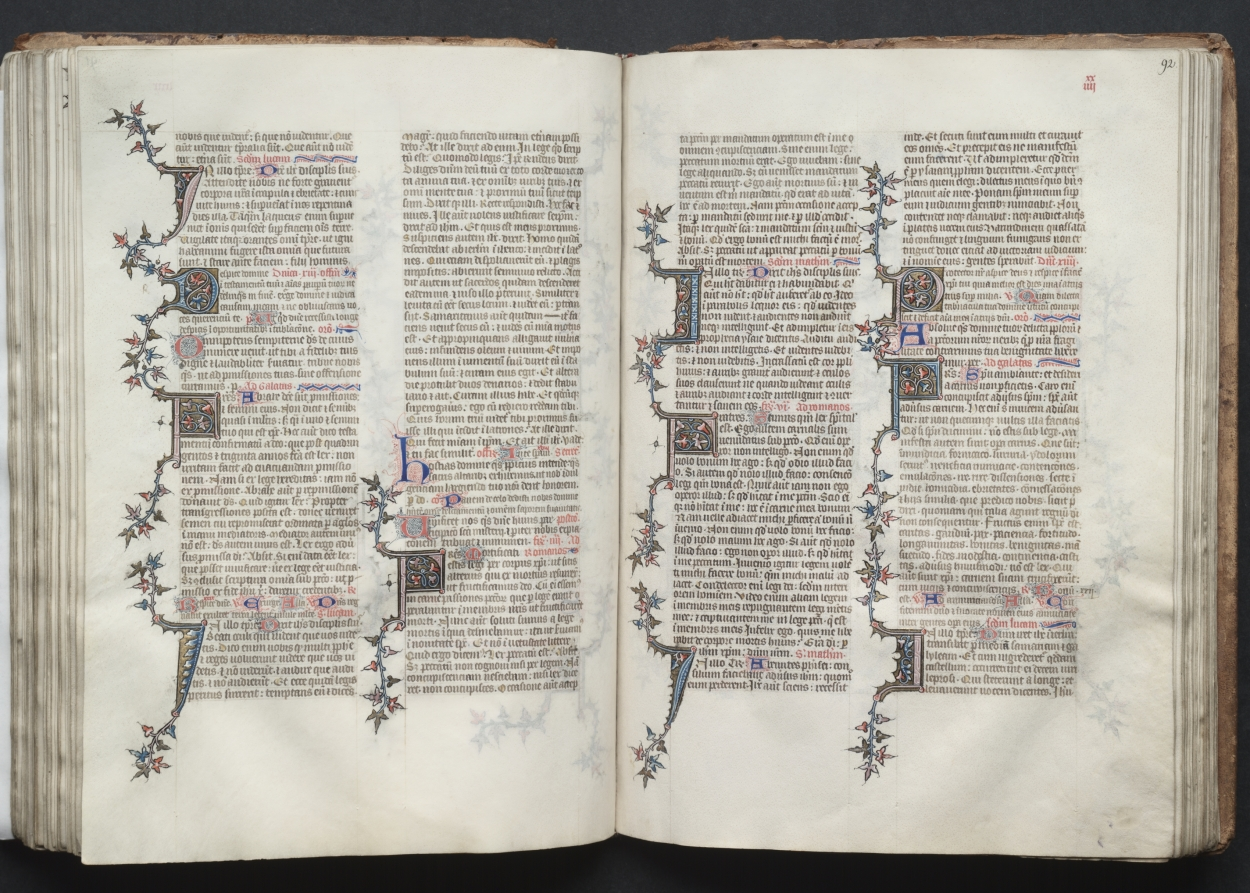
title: The Gotha Missal: Fol. 91v, Text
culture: France, Paris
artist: Master of the Boqueteaux (French)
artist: and Workshop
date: c. 1375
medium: ink, tempera, and gold on vellum; blind-tooled leather binding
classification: Bound Volume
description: The style and quality of this manuscript's decoration is typical of deluxe Parisian books made for aristocratic or royal patrons. Most of the book's decoration appears to be the work of the Master of the Boqueteaux, an artist active at the court of King Charles V (died 1380). His style was apparently shared by a number of book illuminators working in and around Paris. It is very possible that the Gotha Missal belonged to Charles V, but is not provable because the manuscript has no royal portraits and lacks a colophon. Given the book's magnificent decoration, however, it would seem that it was produced for a Valois prince, if not for the king himself. The manuscript receives its name from the German dukes of Gotha, its later owners.